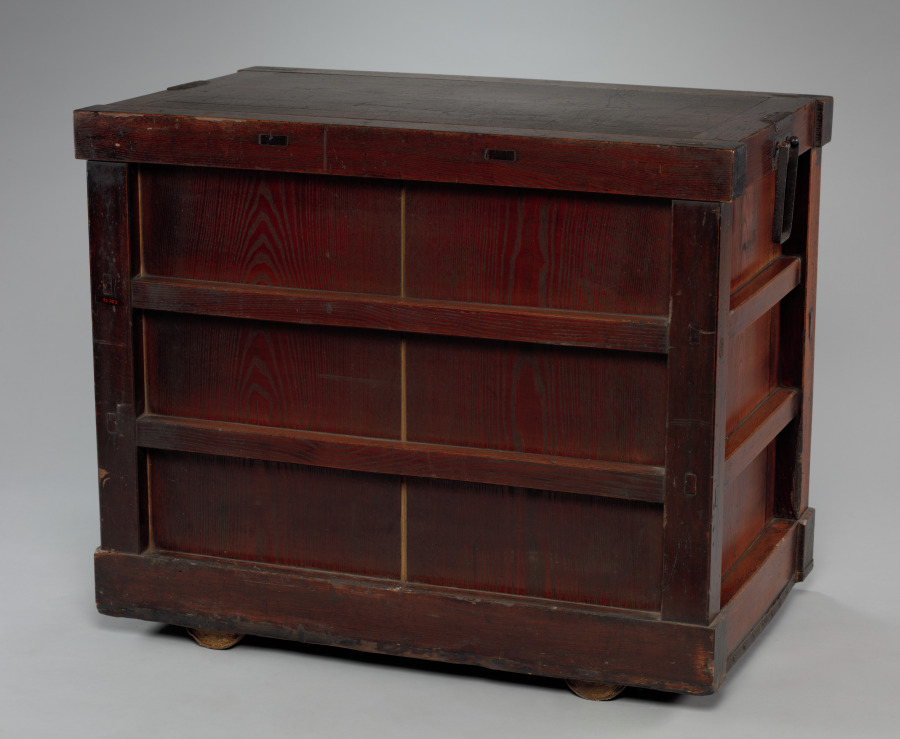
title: Chest on Wheels (Kurumadansu)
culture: Japan, Edo period (1615–1868)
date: 1715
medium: wood with iron fittings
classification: Furniture and woodwork